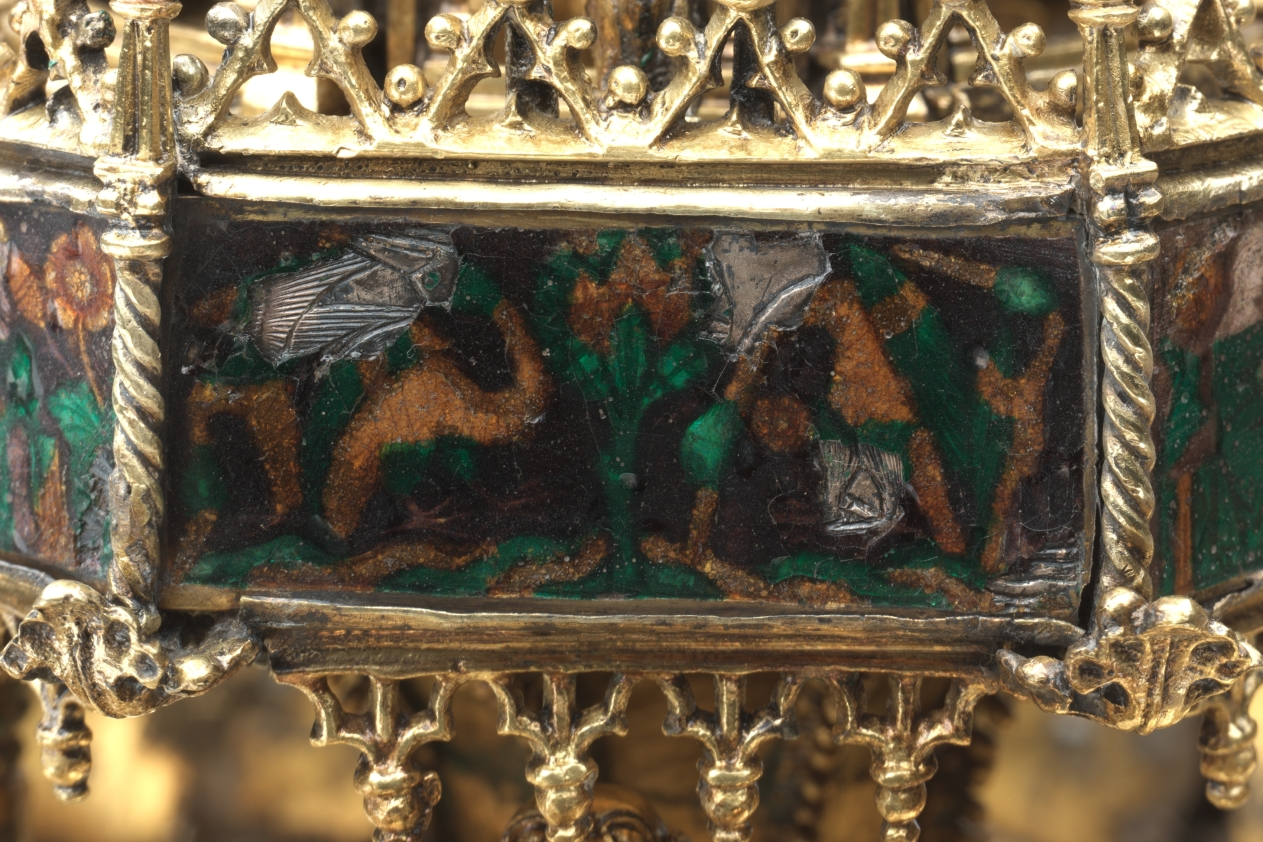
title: Table Fountain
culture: France, Paris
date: c. 1320–40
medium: gilt-silver and translucent enamels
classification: Metalwork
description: Conceptually and stylistically, this object is beyond all else a piece of Gothic architecture in miniature with vaults, pinnacles, columns, and traceried arches. Though the artist who created it is unknown, he was unquestionably inspired by the great Gothic buildings of his time. The table fountain is a three-tiered assembly combining cast elements with bent sheets of gilt-silver. To these have been attached a series of enamel plaques representing grotesque figures, some of which play musical instruments. Water wheels and bells were added to capture motion and sound. The rich detail, precious materials, and involved ornamentation of this deluxe object suggest it would have been expensive to produce and highly treasured by its original owner, someone of high status, and would have been deployed as an object of spectacle. This is the most complete example of its type known to survive from the Middle Ages. Medieval inventories reveal that small fountains like this, often taking various forms, and generally made from precious metals, once existed in large numbers, thus making the Cleveland table fountain an extremely rare object.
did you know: This fountain with its minute architectural details and finely made enamel plaques displayed the wealth and refinement of the owner as it entertained his guests. Imagine hearing the ringing of the tiny bells when this fountain was in use.